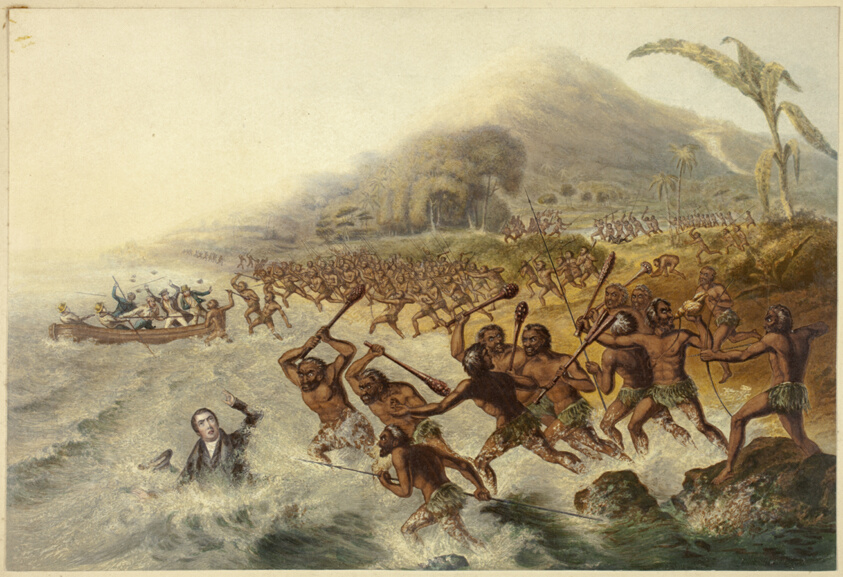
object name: Print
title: The Massacre of the Lamented Missionary the Rev. J. Williams and Mr. Harris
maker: Baxter, George; English, 1804-1867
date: 1841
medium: Steel engraving colored with wooden blocks on cream wove paper, laid down on buff board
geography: England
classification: wood engraving; print; prints and drawing